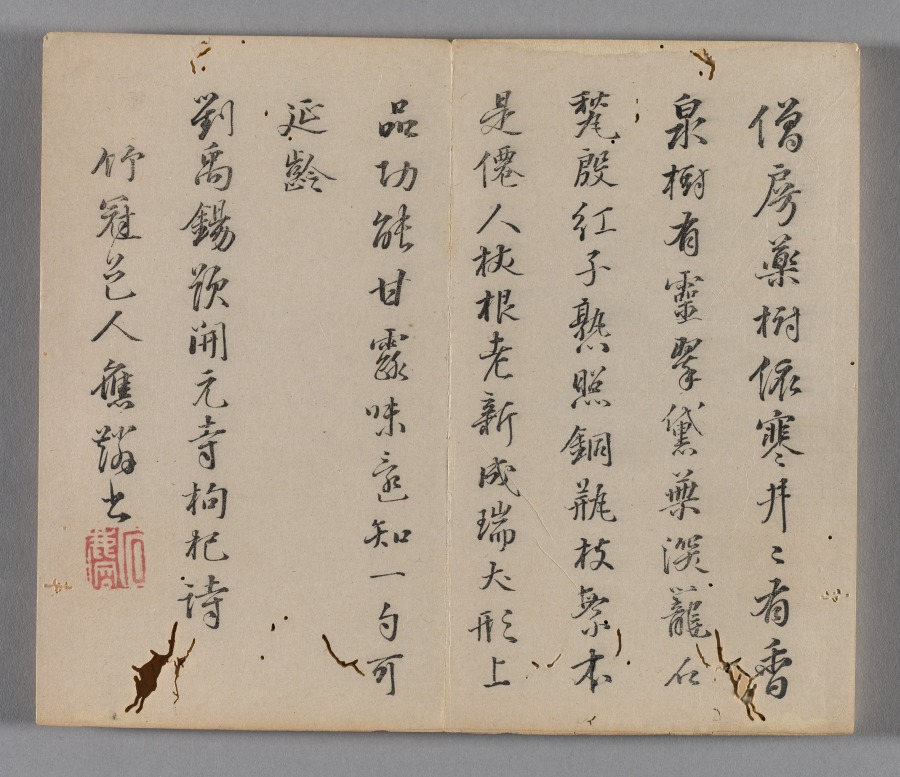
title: Ten Bamboo Studio Collection of Calligraphy and Painting: Miscellaneous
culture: China, Qing dynasty (1644-1911)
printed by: Hu Zhengyan (Chinese, c. 1584–1674)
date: 1633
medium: Woodblock-printed book; ink and colors on paper; first edition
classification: Print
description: Color printing reached a level of perfection in the early 1600s, as seen in this Ten Bamboo Studio Collection of Calligraphy and Painting and the Mustard Seed Garden Manual of Painting (printed 1679 and 1701). The painterly quality, precision in registering (aligning) the woodblocks, and harmonious colors made them the most successful color print editions in Chinese history. Both editions were printed and compiled in Nanjing, spread nationwide, and had a great impact on the arts in Japan and Korea.